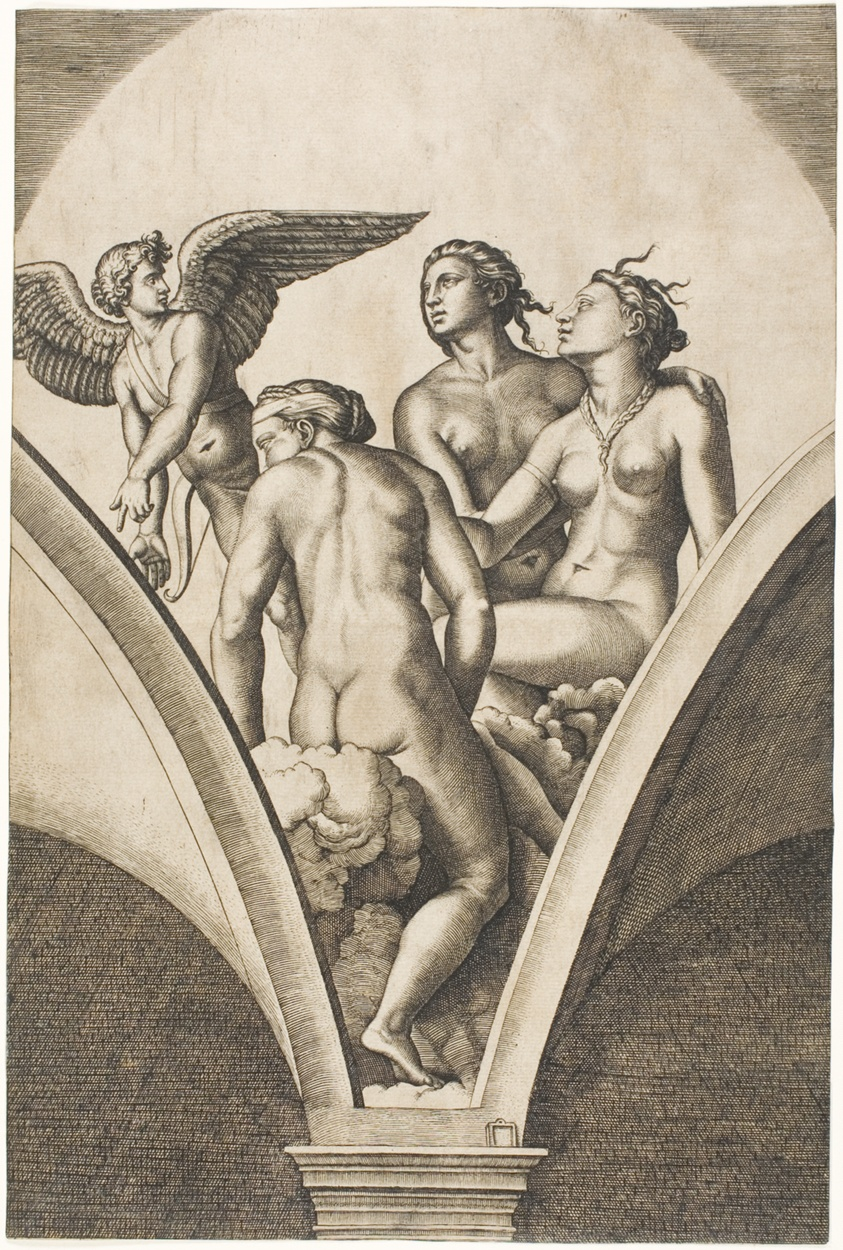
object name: Print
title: Cupid and the Three Graces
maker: Marcantonio Raimondi (Italian, c. 1480-1534); after Raffaello Sanzio, called Raphael (Italian, 1483-1520)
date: 1518/19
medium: Engraving in black on cream laid paper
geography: Italy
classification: engraving; print; prints and drawing